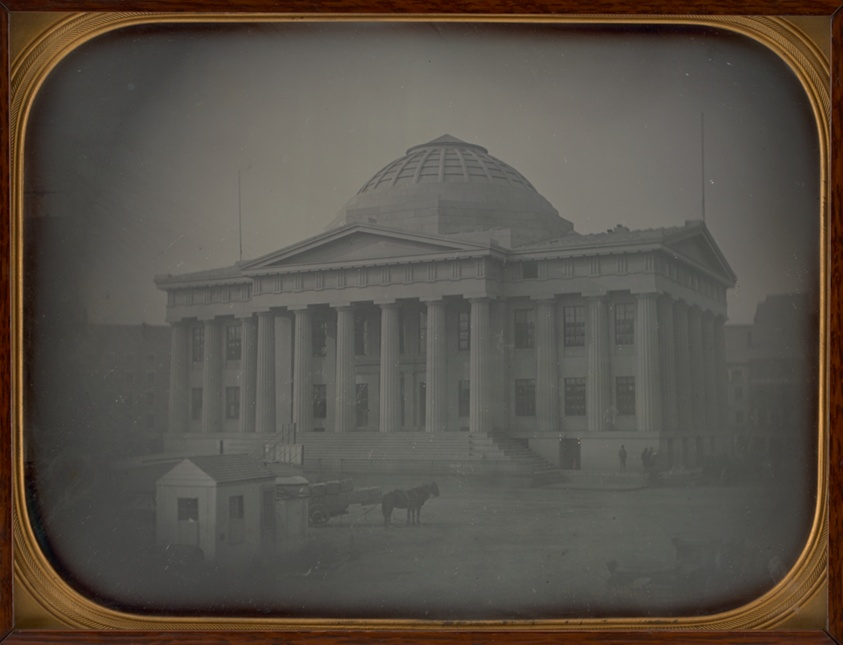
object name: Photograph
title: Untitled (Boston Customs House)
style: 19th century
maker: Albert Sands Southworth (American, 1811-1894); and Josiah Johnson Hawes (American, 1808-1901)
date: 1850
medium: Daguerreotype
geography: United States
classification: portrait; photograph; photographic process; photography; daguerreotype; portrait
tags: lundberg collection, architecture, architecture, boston, buildings, urban life